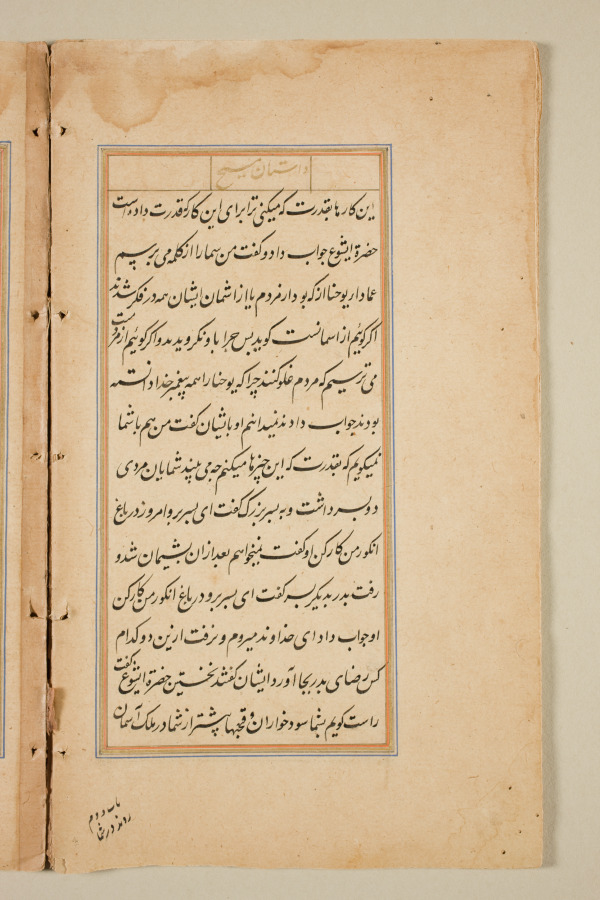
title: Text page from a Mirror of Holiness (Mir’at al-quds) of Father Jerome Xavier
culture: Mughal India, Allahabad, made for Prince Salim (1569–1627)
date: 1602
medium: Ink and gold on paper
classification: Manuscript